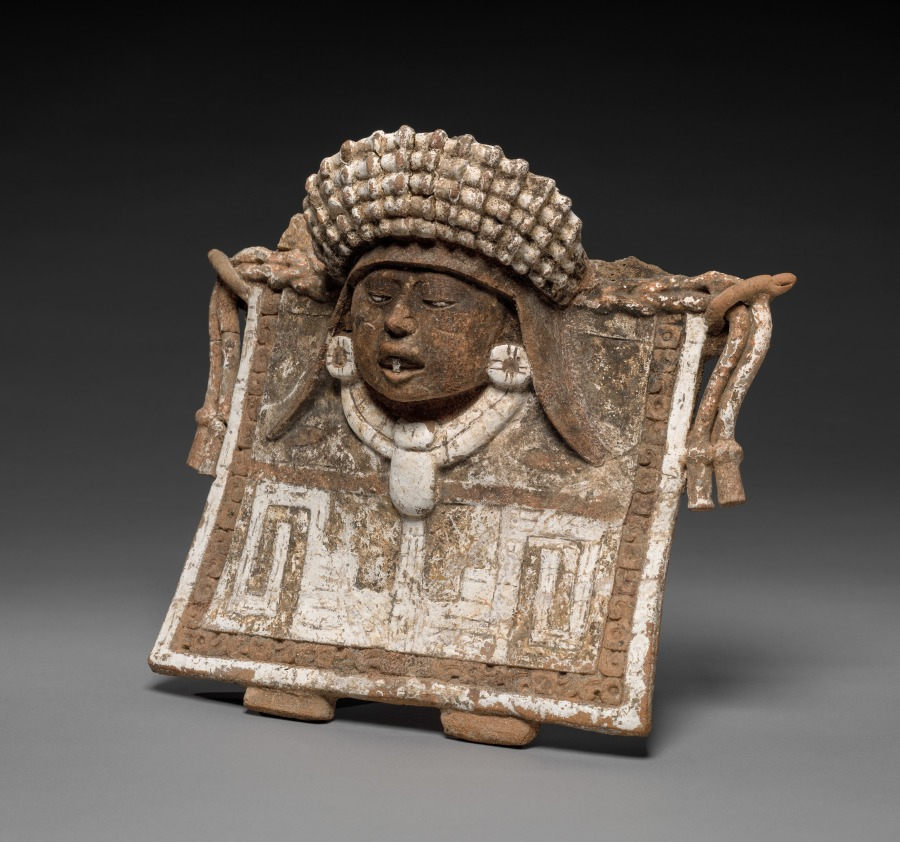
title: Standing Female Figure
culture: Mesoamerica, Veracruz, Nopiloa style?, 7th-10th century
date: 600–1000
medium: ceramic, pigment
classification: Sculpture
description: Ancient Veracruz artists used ceramic to create figural sculptures in a range of sizes, styles, and types. This beautiful, finely wrought female figure is an exceptional example. Although her identity is unknown, her adornments signal high status: ear ornaments, a large necklace, an elaborate dress that drapes over her outstretched arms, and perhaps even her front teeth, filed into a T shape, may have symbolic importance. The unfinished back, with a tripod support, suggests that the figure was meant to be seen from the front.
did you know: This lovely female’s body is a flat plaque supported by a tripod at the rear.